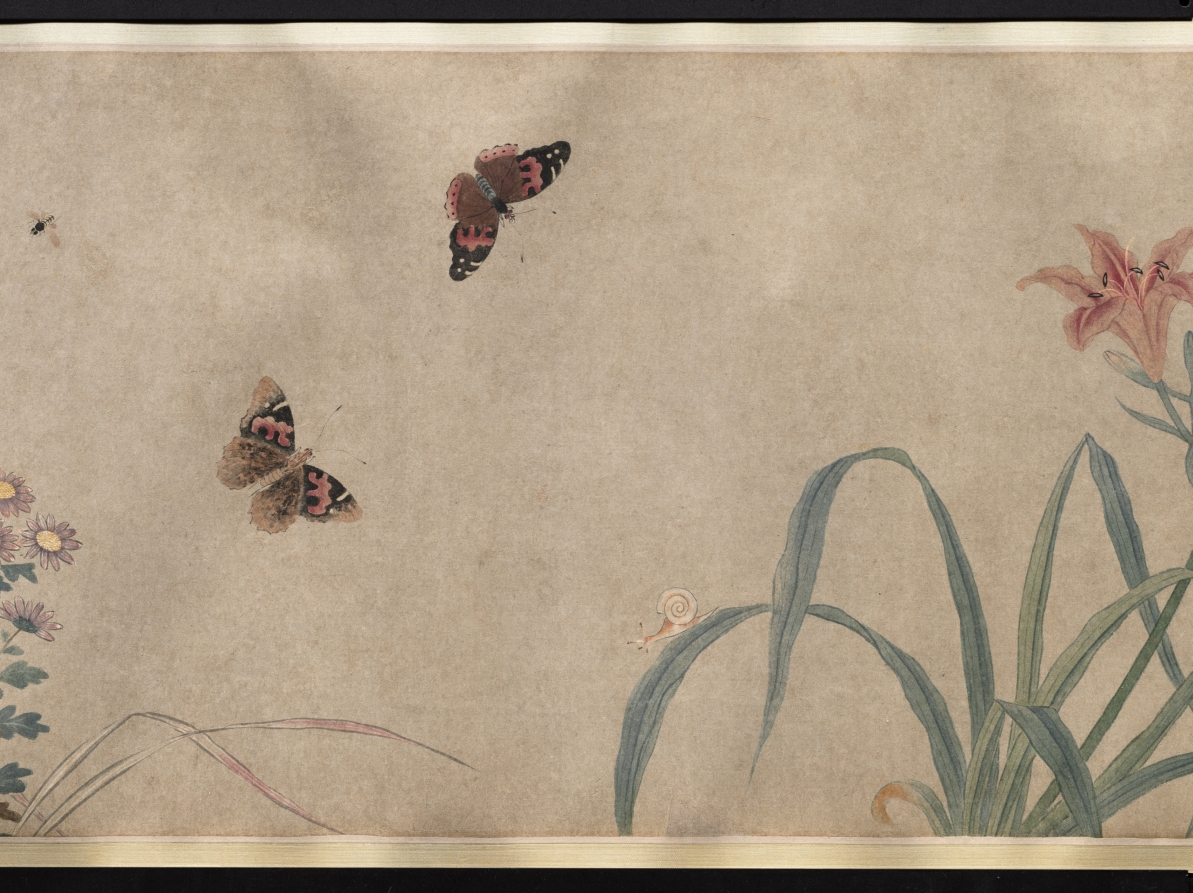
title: Insects and Flowers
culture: China, Qing dynasty (1644-1911) or Republican period (1912-49)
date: c. 1900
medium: Handscroll, ink and color on paper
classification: Painting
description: More than 26 feet long, this scroll presents insects, reptiles, and plants in delicate brushwork and pale colors, referring in style to earlier Southern Song dynasty (1127–1279) bird-and-flower paintings. Upon closer inspection, ants dismember a butterfly and reptiles wait to ambush their prey. An inscription at the end of the painting gives us an idea of its meaning: Attributed to the Qing dynasty scholar Zhang Xigeng (張錫庚, 1801–1861), the inscriber relates the work to an earlier painting by Qian Xuan (錢選, c. 1235–before 1307) and further suggests that the painting may allude to the relentlessness of natural selection. By drawing a parallel to tumultuous episodes in Chinese history, the writer might even hint at the domestic rebellions and the aggression of Western powers against China in his lifetime, particularly the Opium Wars (1839–60).